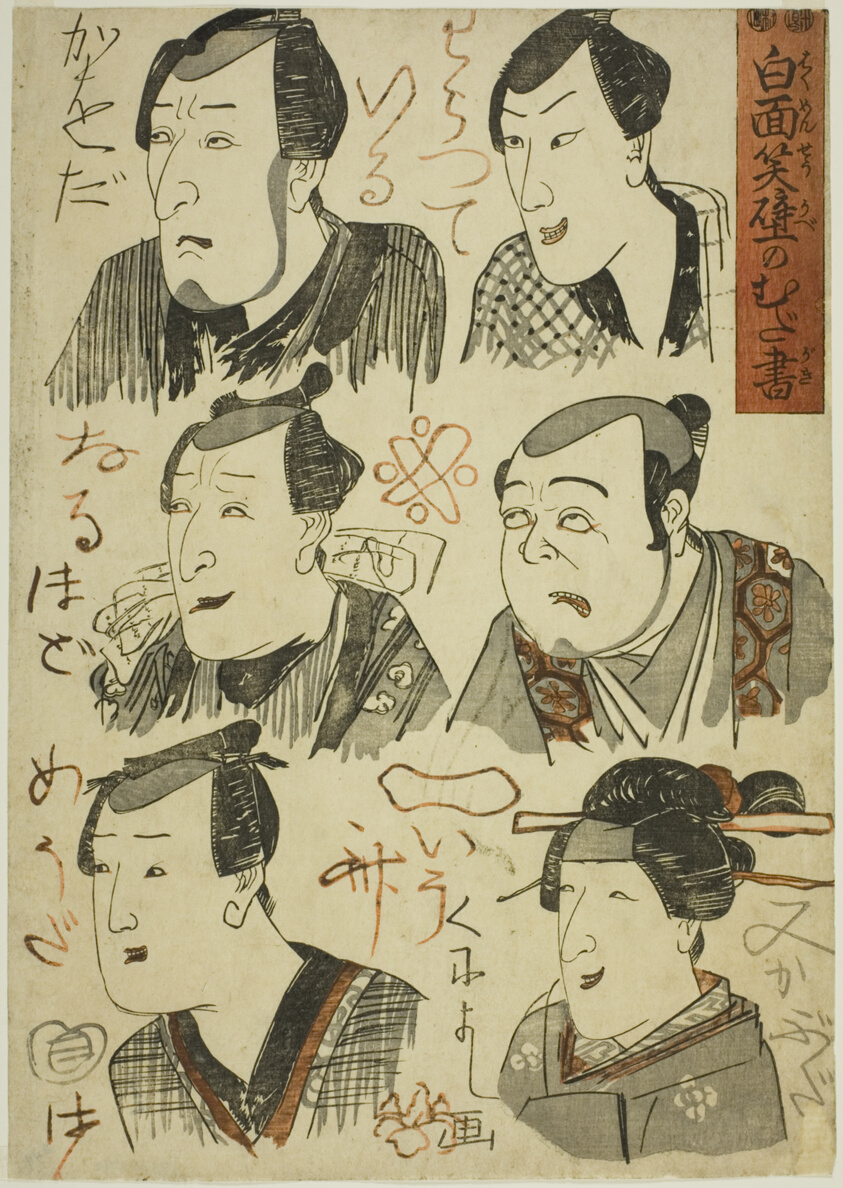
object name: Print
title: Caricatures of Laughing Actors Scribbled on a Wall (Hakumensho kabe no mudagaki)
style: Japanese (culture or style)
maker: Utagawa Kuniyoshi (Japanese, 1797-1861)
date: c. 1848/51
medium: Color woodblock print; left sheet of oban triptych (right: 1975.474, center: 1975.476)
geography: Japan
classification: woodblock print; print; asian art